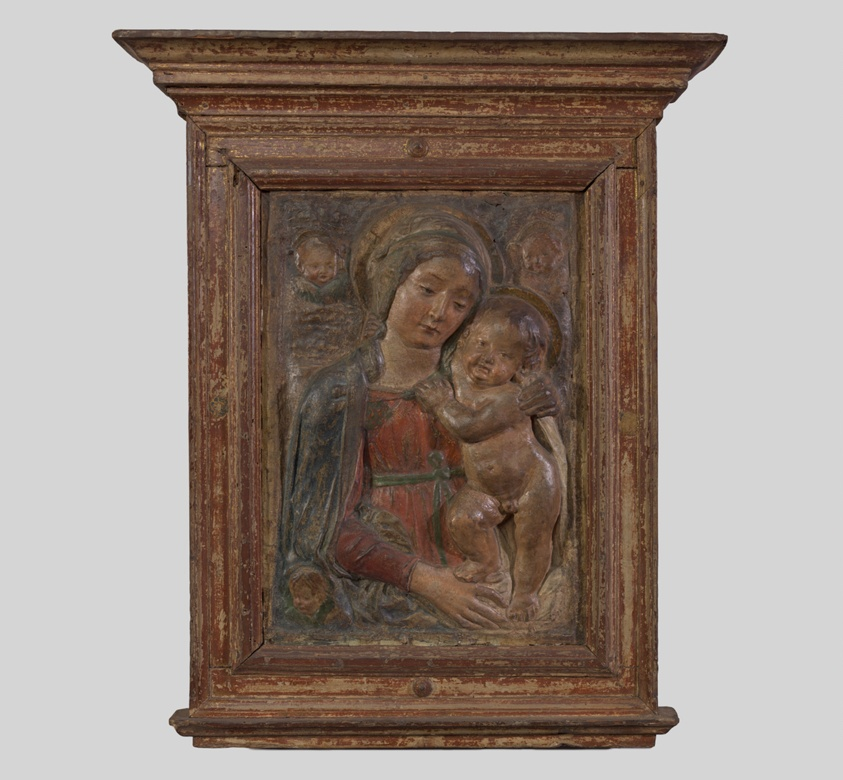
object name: Sculpture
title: Madonna and Child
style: 15th century, Renaissance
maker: After Antonio Rossellino (Italian, 1427–1479)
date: c. 1450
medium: Cartapesta with polychromy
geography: Italy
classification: relief; sculpture; Italian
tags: Virgin and child/Madonna and child, child, Christian subjects, Christianity, Devotion, Jesus, mother, mother and child, religion, religious, religious figures, sons, Virgin Mary